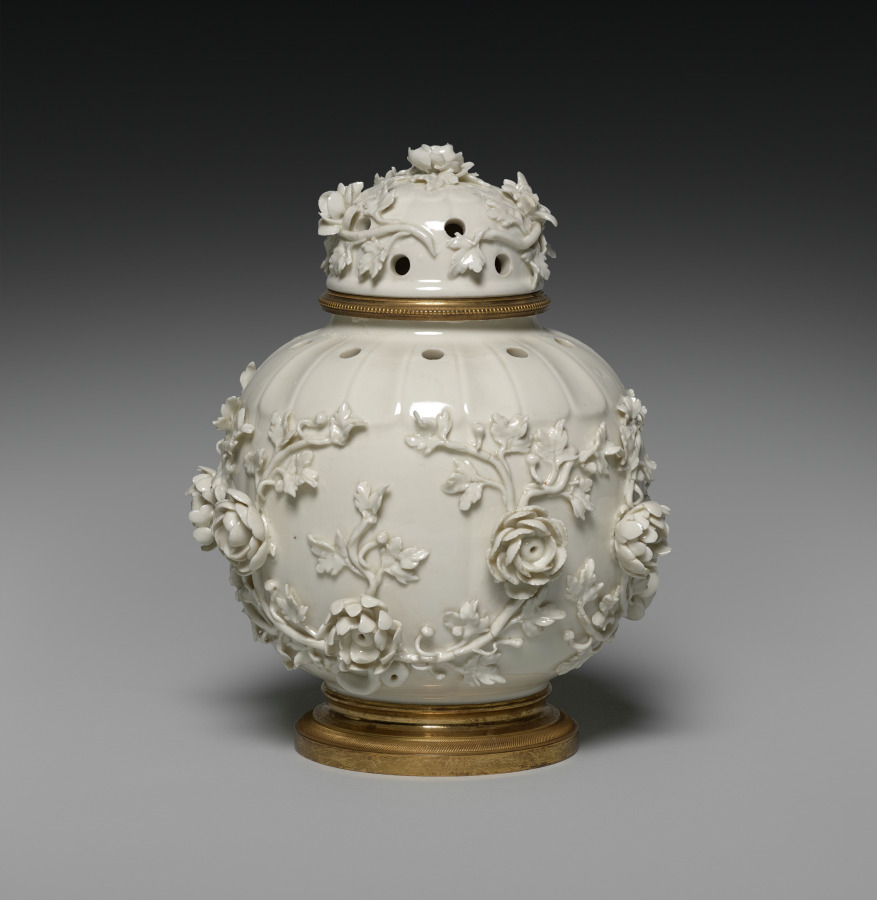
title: Potpourri Vase with Cover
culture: France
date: c. 1860–80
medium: blanc-de-chine porcelain; gilt bronze mount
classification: Ceramic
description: This vase was likely made by the celebrated Parisian ceramics firm of Edmé Samson (1810-91). To cater to the resurgence in taste for 18th-century designs, the Samson firm specialized in making reproductions of rare 18th-century European porcelains, especially those from firms that had already copied Chinese porcelains. In this case, this vase's design is taken from models produced by the St. Cloud factory in the 1750s after earlier Qing dynasty Chinese ceramics. However, the telltale sign that this vase is made by Samson and not St. Cloud is that the original would have been made from a soft-paste porcelain (fired at a lower temperature), while this example is made of hard-paste porcelain (fired at the highest temperature).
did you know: Potpourri vases always have holes in the top to let the scent of dried spices and flowers contained within freshen the air around them.